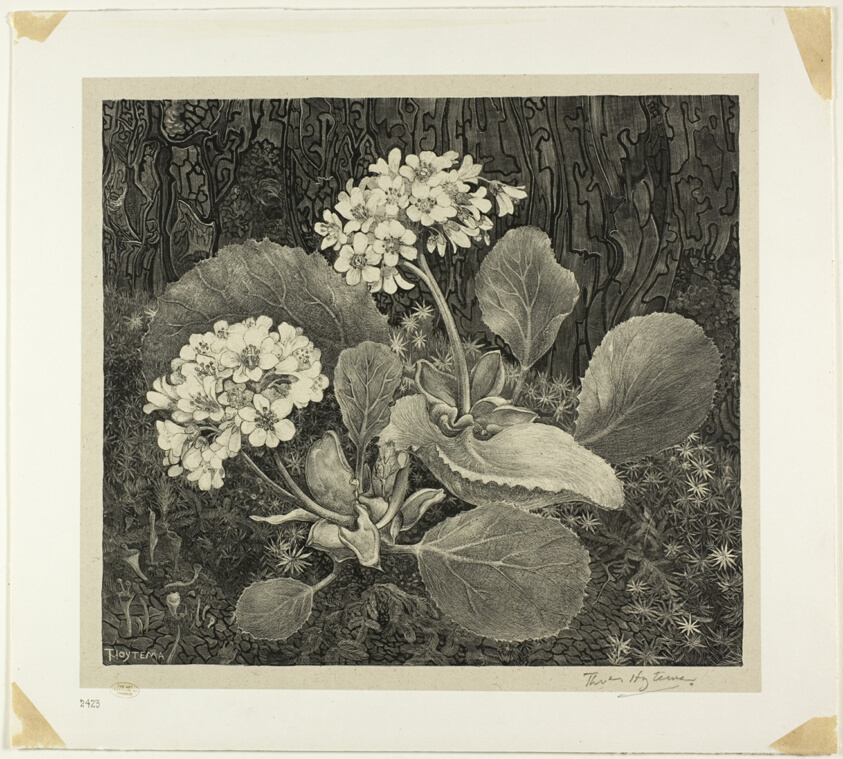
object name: Print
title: Little Plant in Moss, plate one from Flower Studies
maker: Theodoor van Hoytema (Dutch, 1863-1917)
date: 1898, printed 1917/19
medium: Lithograph in black on grayish-ivory China paper, laid down on ivory wove paper (chine collé)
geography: Holland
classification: lithograph; print; prints and drawing